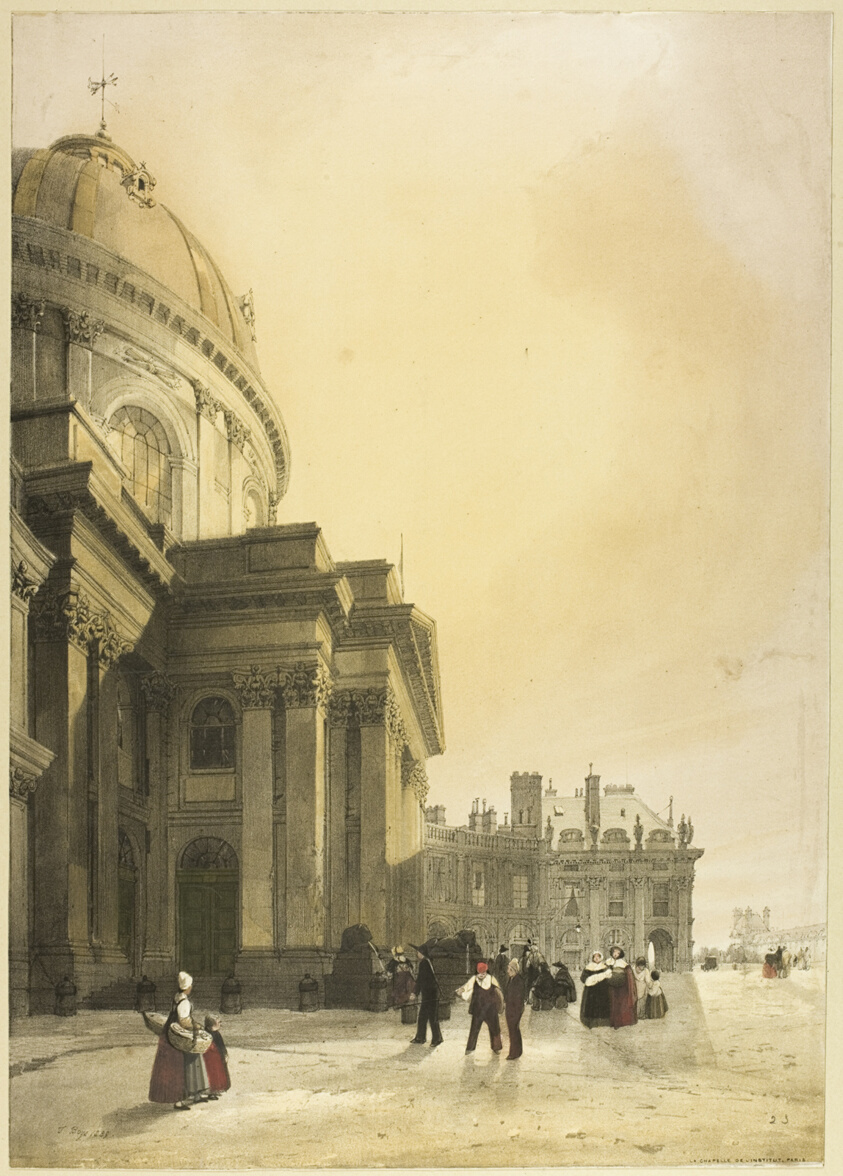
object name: Print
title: The Institute, Paris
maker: Thomas Shotter Boys (English, 1803-1874); published by Charles Joseph Hullmandel (English, 1789-1850)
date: 1839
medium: Color lithograph on paper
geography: England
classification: lithograph; print; prints and drawing